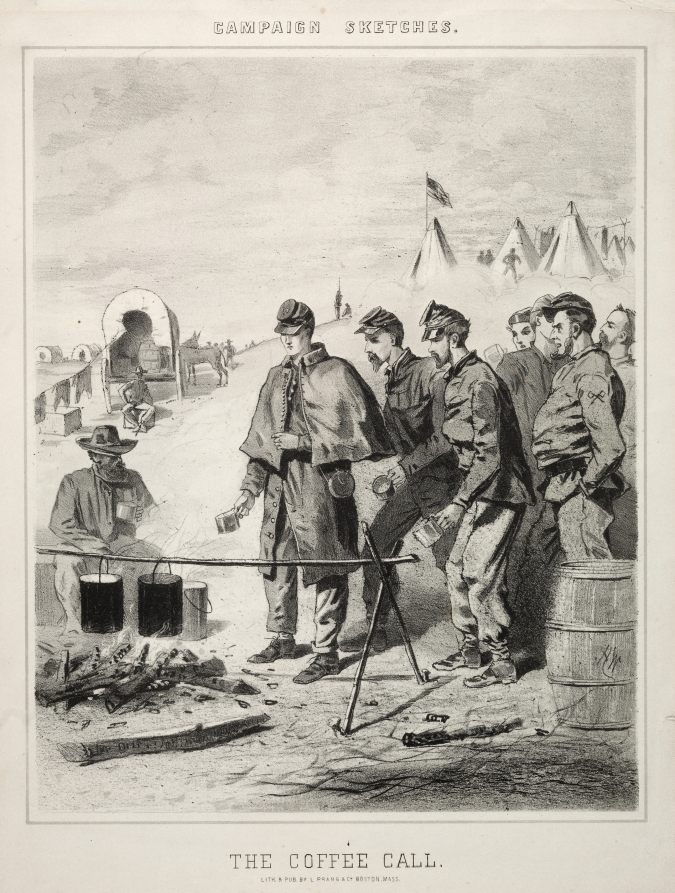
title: Campaign Sketches: The Coffee Call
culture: America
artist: Winslow Homer (American, 1836–1910)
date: 1863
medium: lithograph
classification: Print